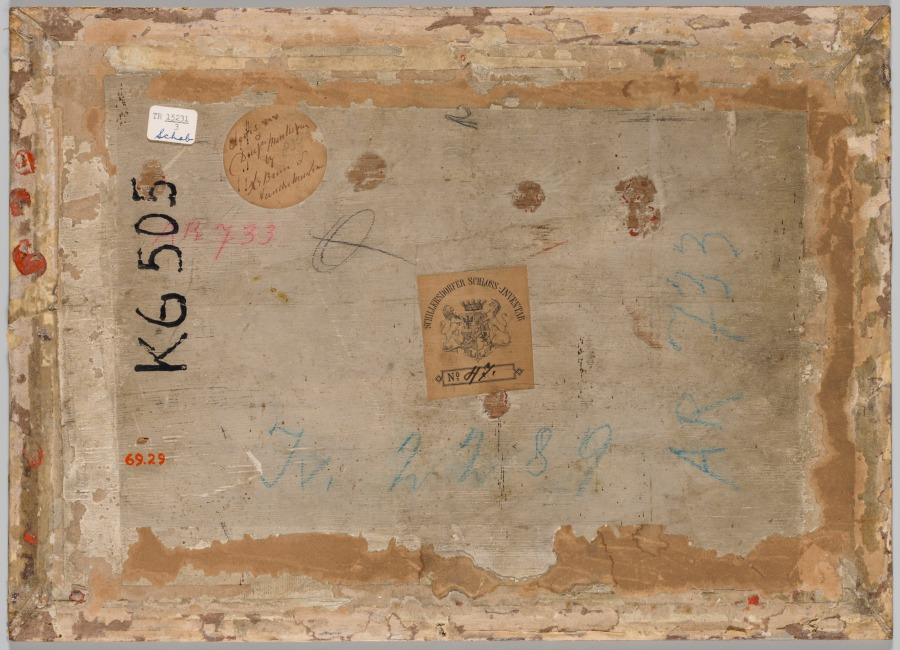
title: Louis XIV Captured by Venus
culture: France, 17th century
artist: studio of Charles Le Brun (French, 1619–1690)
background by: Adam Frans van der Meulen (Flemish, 1632–1690)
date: early 1670s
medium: black chalk, graphite, and brush and gray wash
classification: Drawing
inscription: VERSO, ON WOOD PANEL, upper left, in brown ink [on sticker]: Louis XIV / & / Duc[illegible] Montespan / by / Le Brun & / Van der Meulen ; [on same sticker] in graphite: [809?] ; center, in brown ink [on Schillersdorfer Schloss-Inventar sticker]: 47 ; upper left, in black paint: K6505 [sideways] ; upper left, in red crayon: AR 733 ; center right, in blue crayon: AR 733 ; lower center, in blue crayon: Iv. 2289